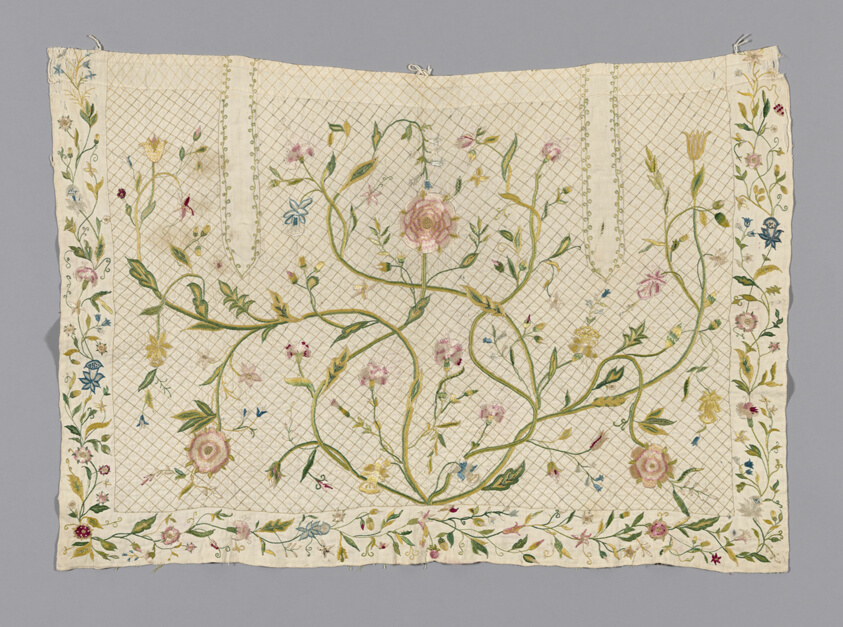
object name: Textile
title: Apron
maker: England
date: 1701/25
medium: Linen, plain weave; embroidered with silk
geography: England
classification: textile; costume; needlework (visual works)